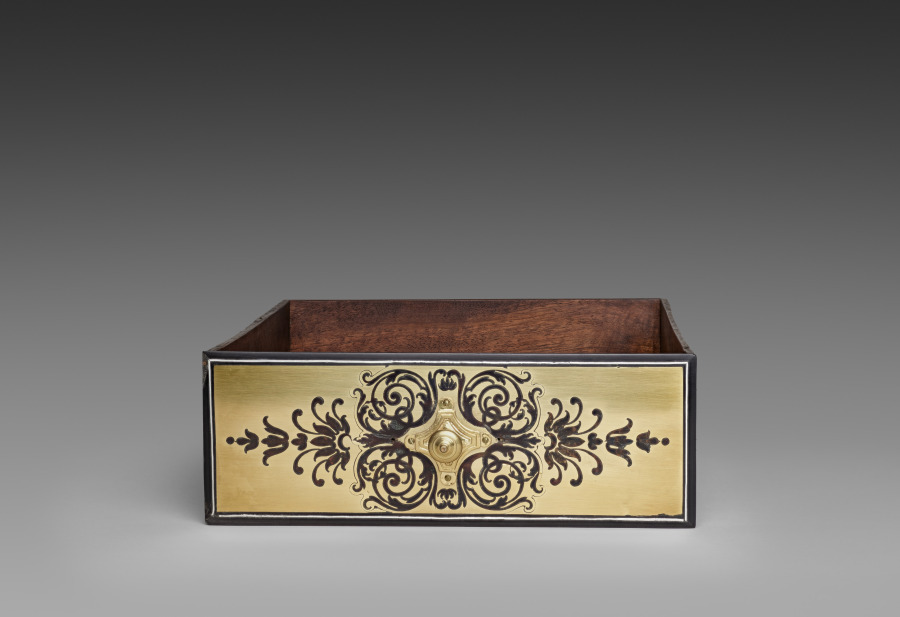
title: Interior Drawer for Cabinet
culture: France, late 17th Century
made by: André-Charles Boulle (French, 1642–1732)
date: c. 1690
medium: ebony, marquetry in metal and tortoiseshell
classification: Furniture and woodwork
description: Appointed cabinetmaker to King Louis XIV in 1672, André-Charles Boulle became a master of furniture making in France during the late 1600s until his death in 1732. Known primarily for his use of marquetry, in which metal patterns are inlaid into tortoiseshell then applied within the veneered surface of the furniture, Boulle established a level of quality and craftsmanship few others could achieve. As a result, his work found favor at the royal court and among other aristocrats and diplomats eager to impress the king. The inclusion of a medallion depicting Louis XIV within the bronze decoration of this chest would have identified the owner with the royal court. Often exhibiting stout architectural proportions with elegant groups of inlaid motifs such as the parrot on the central panel of this chest, Boulle’s designs are an example of the intellectual fashion for contrasting ideas, materials, and motifs.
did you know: Originally designed to sit atop an elaborate tall stand, this chest was likely altered in the late 1700s to reduce its scale and height.